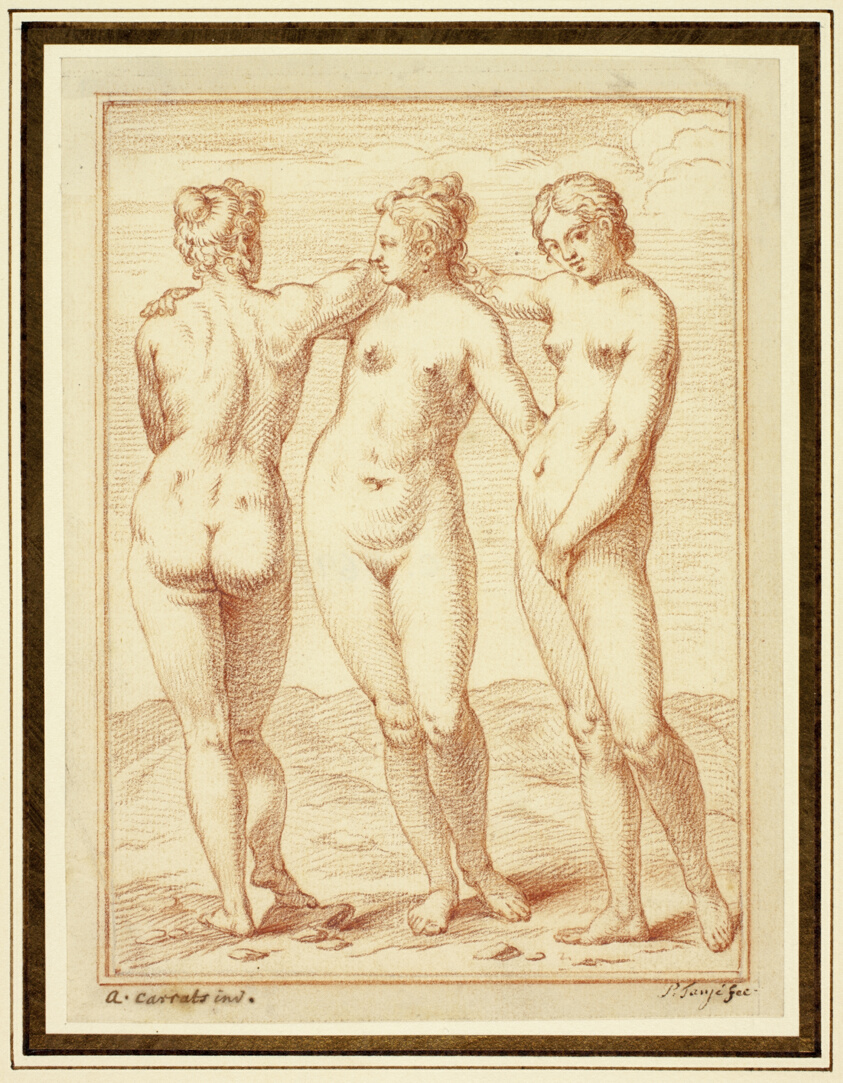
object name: Drawing and Watercolor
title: The Three Graces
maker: Pieter Tanjé (Dutch, 1706-1761); after Agostino Carracci (Italian, 1557-1602)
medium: Red chalk on cream laid paper, edge mounted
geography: Netherlands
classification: chalk; drawings (visual works); prints and drawing